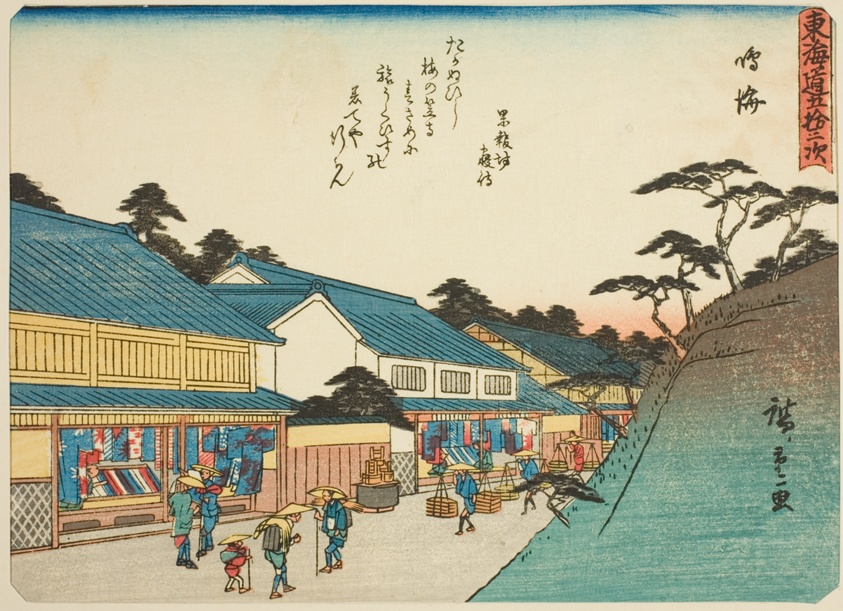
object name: Print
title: Narumi, from the series "Fifty-three Stations of the Tokaido (Tokaido gojusan tsugi)," also known as the Tokaido with Poem (Kyoka iri Tokaido)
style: Japanese (culture or style)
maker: Utagawa Hiroshige 歌川 広重; Japanese, 1797-1858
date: c. 1837/42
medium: Color woodblock print; chuban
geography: Japan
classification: woodblock print; print; asian art